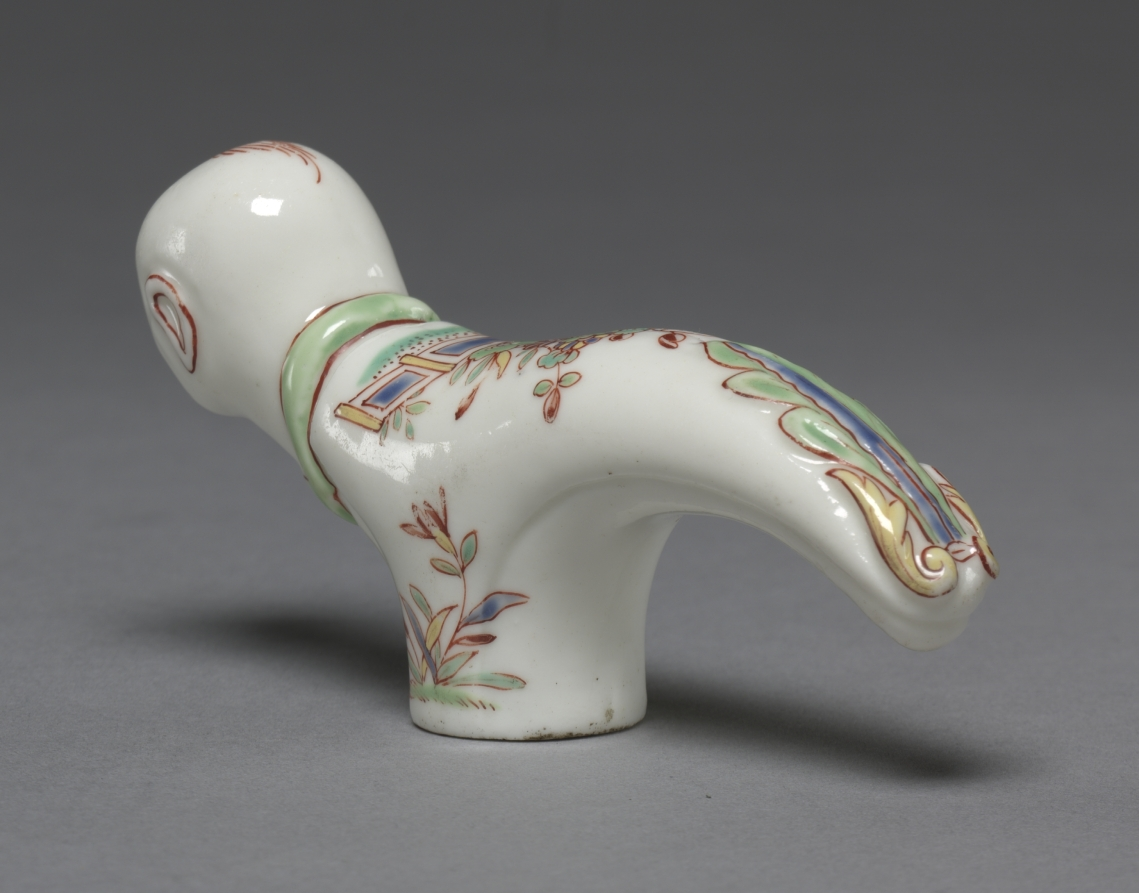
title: Cane Handle (Poignée de canne)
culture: France, Saint Cloud, 18th century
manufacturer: Saint Cloud Porcelain Factory (French)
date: c. 1745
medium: soft-paste porcelain with enamel decoration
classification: Ceramic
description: During the first half of the 18th century, porcelain cane handles were widely produced by the Saint-Cloud porcelain factory. This cane handle, molded in the shape of the head and torso of an Asian man, is representative of the popularity of chinoiserie, European designs that attempted to imitate the art, culture, and techniques of China and Japan.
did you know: The colorful overglaze enamel that decorates this cane handle was typical of Japanese Kakiemon decoration.